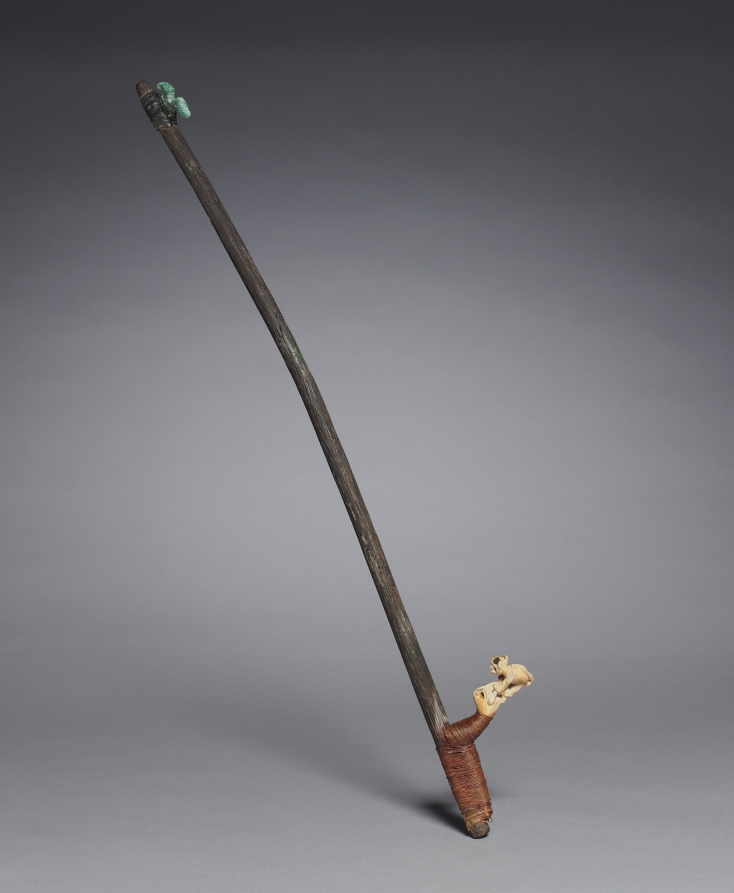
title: Spear-Thrower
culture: Peru, South Coast?, Middle Horizon?, 6th-10th Century?; modern assembly of ancient parts?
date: 600–1000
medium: wood, metal, bone, thread, sinew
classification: Arms and Armor